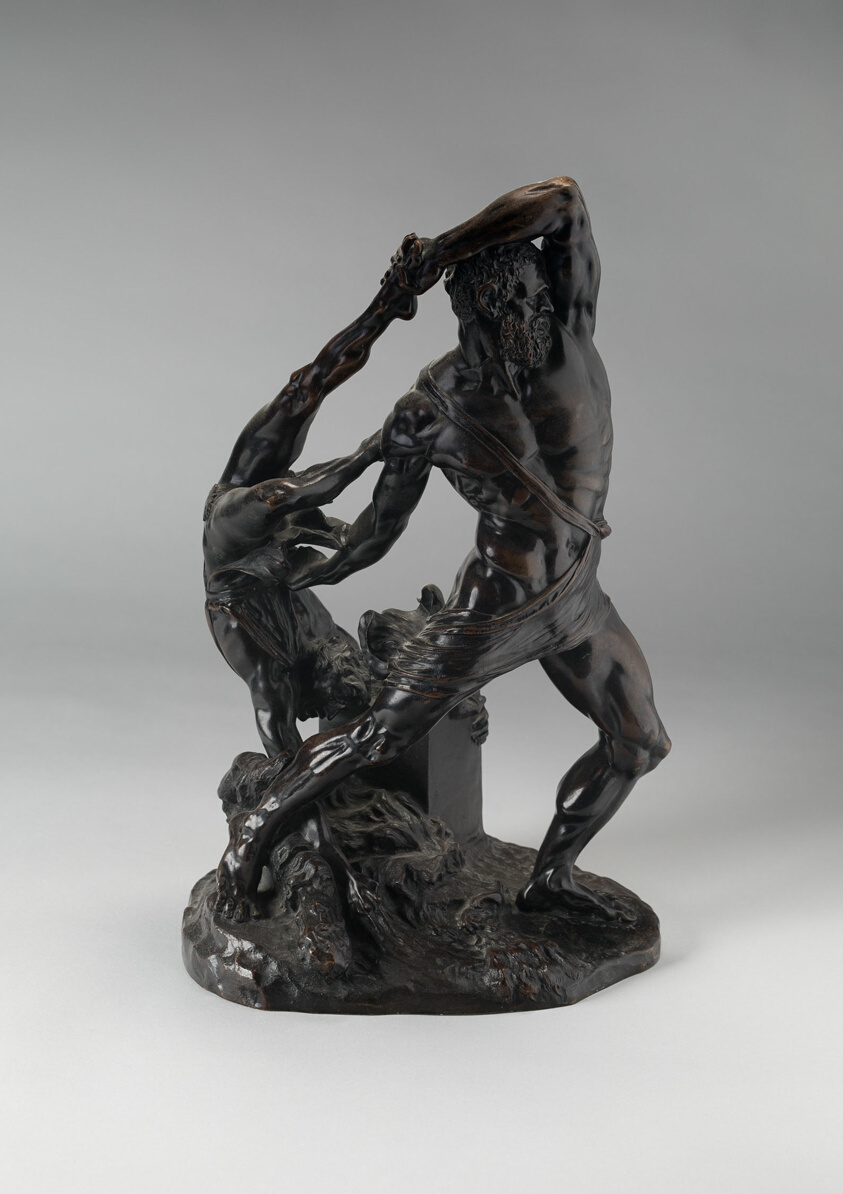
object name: Sculpture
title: Hercules and Lychas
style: nineteenth century, Neoclassicism, 19th century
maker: French; Paris; After a lost model by Antonio Canova (Italian, 1757–1822)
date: 1850/1900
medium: Bronze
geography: Italy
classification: statuette; sculpture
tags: Greek mythology, nudes, mythology, mythological figures, mythical, man, Greek gods, bronze (color)